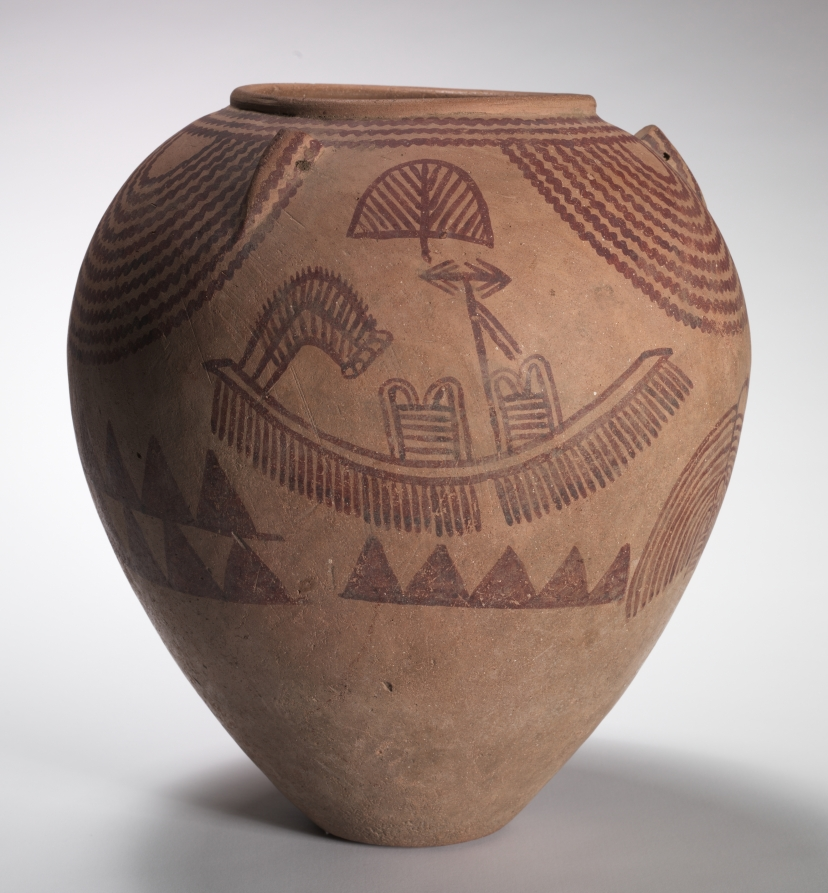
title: Decorated Jar with Boat Scenes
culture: Egypt, Predynastic (5000–2950 BCE), Naqada IIc–d (3650–3300 BCE)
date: c. 3300–3100 BCE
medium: marl clay pottery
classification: Vessels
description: The decoration painted on this jar shows two multi-oared boats traveling through fertile riverbanks lined with trees and aloe bushes. Rows of triangles indicate the desert hills in the background. The Nile was Egypt’s primary means of transportation and communication, since river traffic was far more efficient than travel by land. The concept of boat travel permeated all aspects of Egyptian life and religion. The sun god Ra was believed to travel by boat across the heavens by day and through the underworld by night. Funerary texts describe the trip to the afterlife as a journey by boat, and scenes of boats figured prominently in tomb decoration.